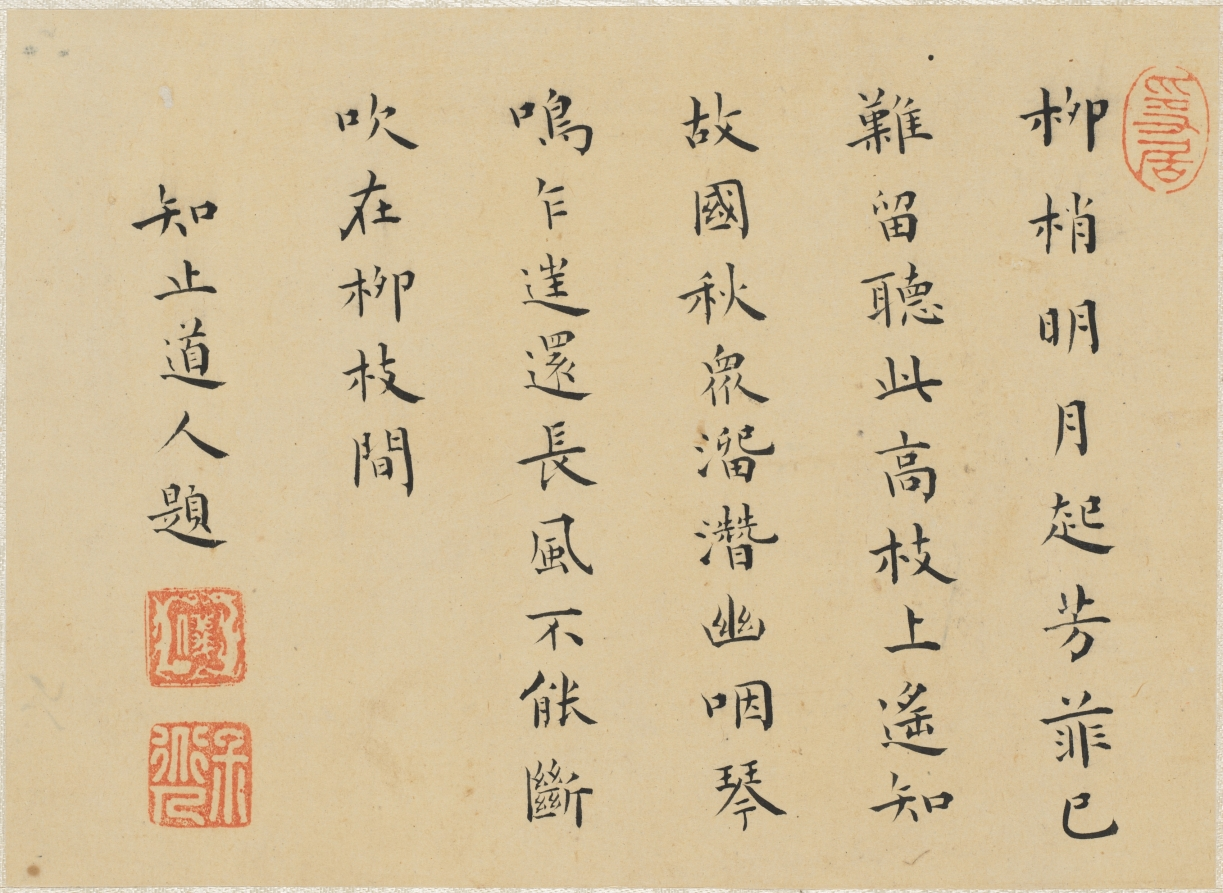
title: Album of Miscellaneous Subjects, Leaf 6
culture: China, Qing dynasty (1644-1911)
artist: Fan Qi (Chinese, 1616–after 1694)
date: early 1650s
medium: album leaf, ink and color on silk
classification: Painting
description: Zhou Yi's calligraphy is across from the painting on leaf six. His colophon reads: The bright moon emerges through the willow, The fragrance of flowers is already difficult to retain. Listening above these tall branches, I sense that faraway in my native place autumn has arrived. Obstructed, all the diminished waters flow, Abruptly the sound of a lute wafts to and fro. A strong wind, unabated, blows among the willow branches.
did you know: A cicada clings to a willow branch while two bees fly in the moonlight .